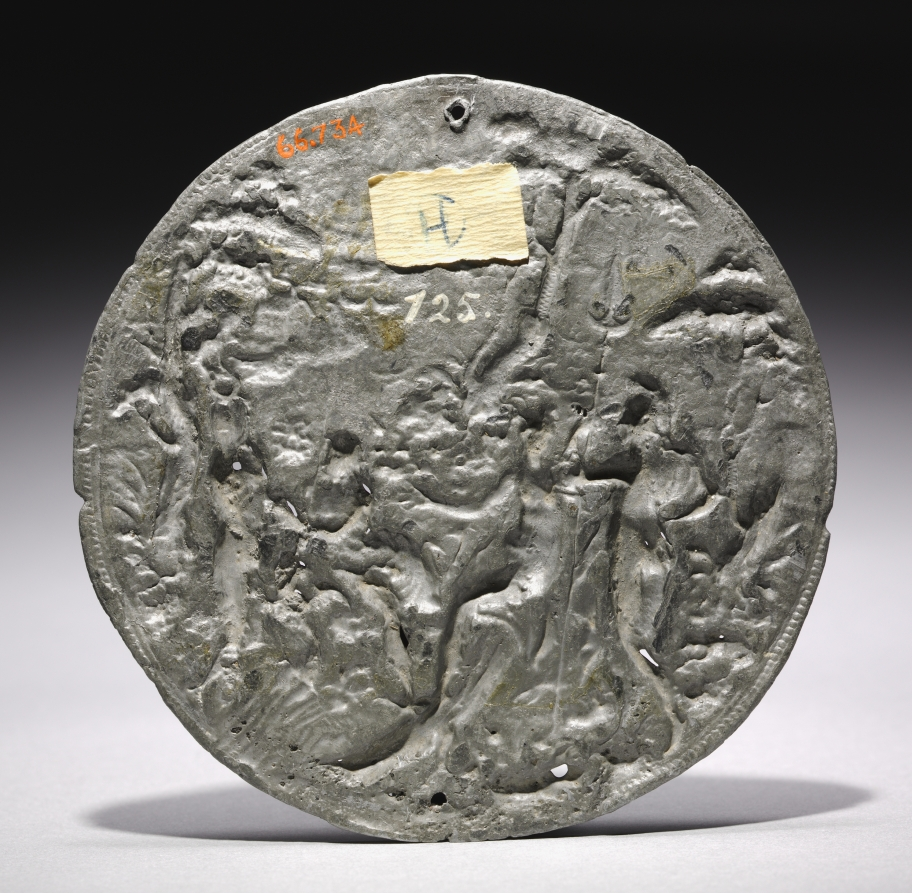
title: Judgment of Paris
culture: Germany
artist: Hans Jamnitzer (German, 1538–1603)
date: c. 1560–1568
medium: lead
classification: Sculpture